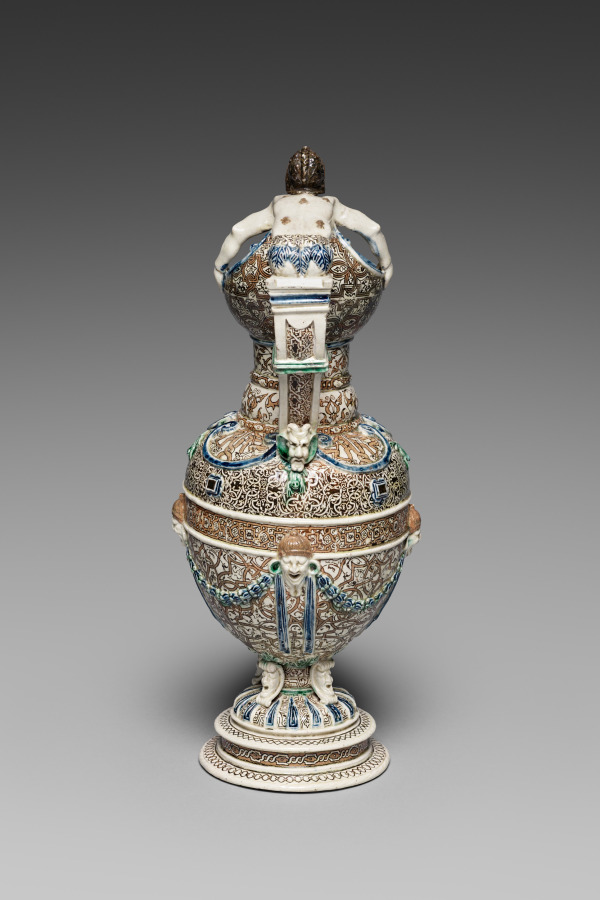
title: Ewer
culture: France, 16th century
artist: Saint-Porchaire (French)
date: c. 1540–67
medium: lead-glazed, white-paste earthenware with inlaid slip decoration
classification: Ceramic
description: An example of one of the most extravagant wares of this kind, this ewer is decorated with applied masks and frogs as well as a variety of stamped and inlaid designs. The shape and patterns reflect the metalwork of the time—the final period of this artistic pottery.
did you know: The green tree frog was one of the symbols of French King Henri II, indicating that this ewer may have either been made for the king or one of his courtiers.